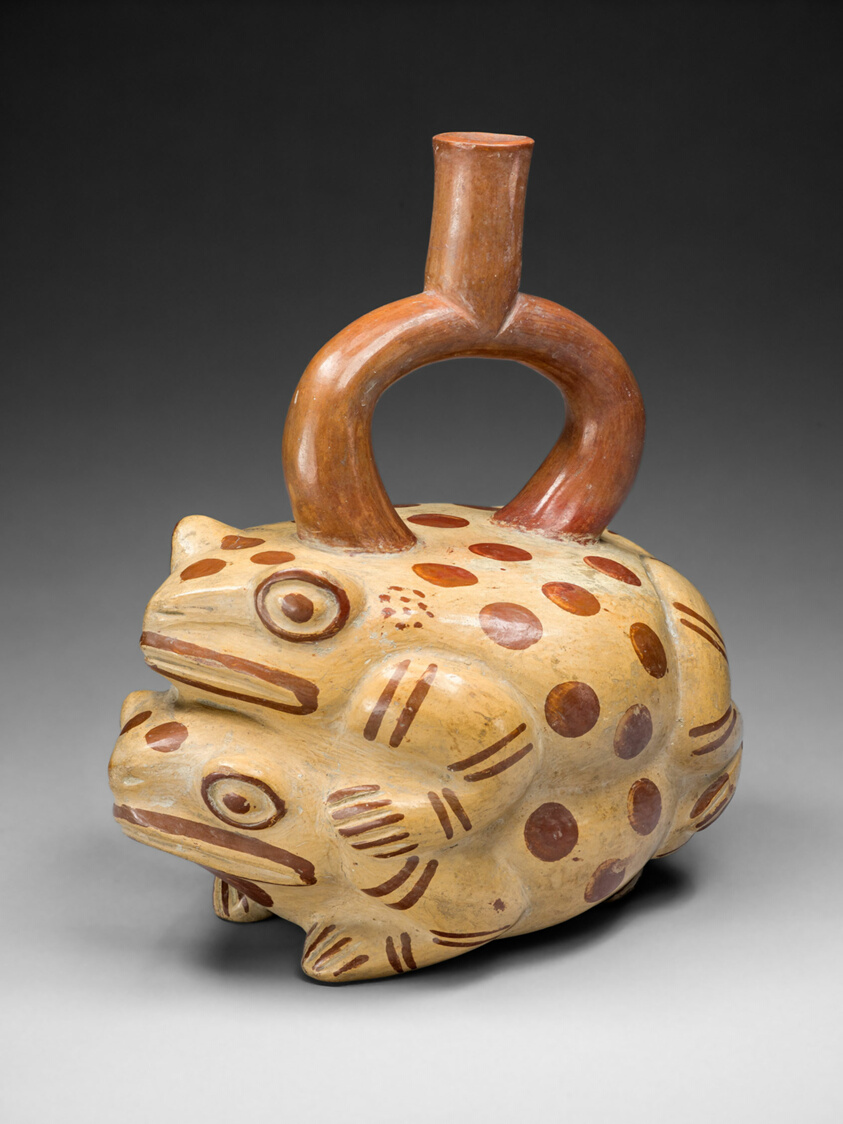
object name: Vessel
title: Vessel Depicting Frogs Mating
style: moche, mochica, early intermediate period, Pre-Columbian, americas, Arts of the Americas, andean, andes, south american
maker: Moche (North coast, Peru)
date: 100 BCE–500 CE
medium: Ceramic and pigment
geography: Peru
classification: earthenware; art of the americas; ceramics; vessel